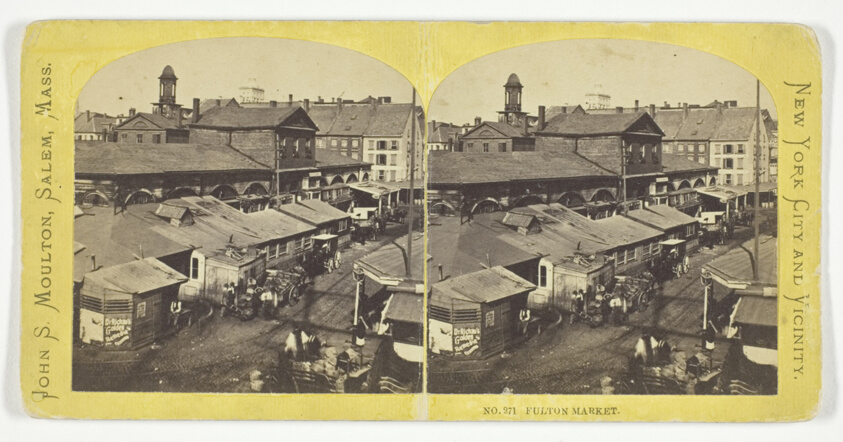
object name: Photograph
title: Fulton Market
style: 19th century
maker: John S. Moulton; American, active mid 19th century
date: Mid 19th century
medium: Albumen print, stereo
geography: New York City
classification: photography; photograph